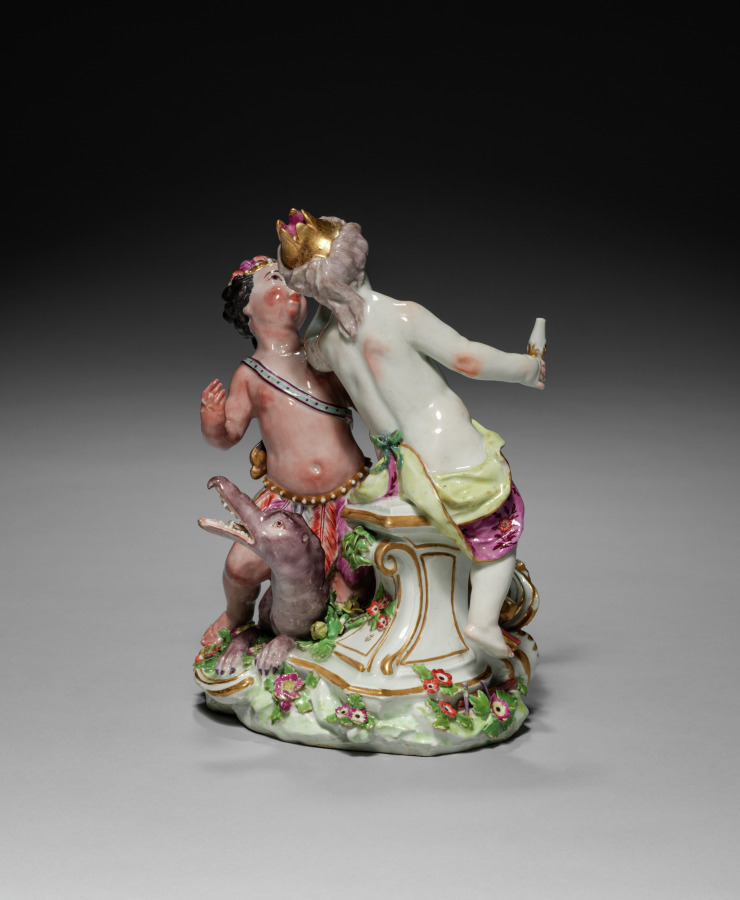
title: Figure of Europe and America from the Four Continents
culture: England, Chelsea, mid-18th century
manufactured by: Chelsea Porcelain Factory (Britain, London, 1745–84)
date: c. 1760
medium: soft-paste porcelain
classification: Ceramic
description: Often collected by wealthy British merchants who were beneficiaries of colonial expansion, figural groups were frequently part of elaborate table decorations meant to signify wealth and global dominance. Here, Europe is seen holding an orb and wearing a crown as queen of the world, suggesting Europe’s supremacy over the other continents. She is entangled with America, who is wearing feathers with a bow and arrow at her feet. This depiction of America reveals a purely imagined understanding of faraway places.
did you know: Figural representations of the four continents date back to the 1500s, but such imagery became even more popular in the 1700s as European empires expanded.